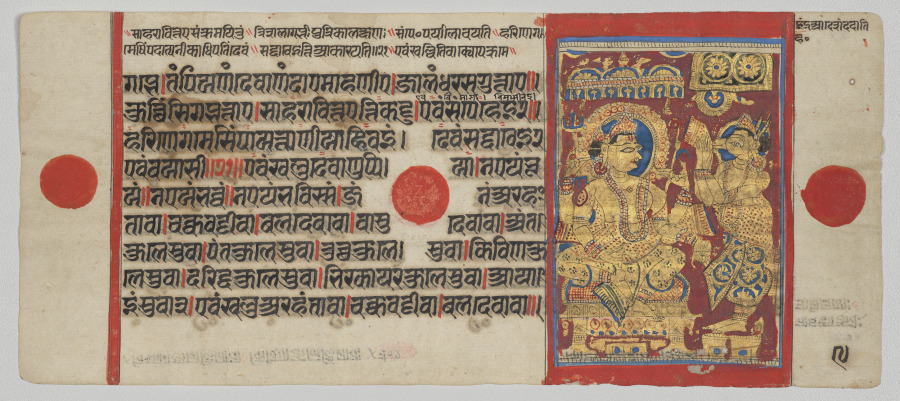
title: Indra Commands Harinaigameshin to Transfer the Embryo of Mahavira, Folio 9 (verso), from a Kalpa-sutra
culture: Western India, Gujarat, last quarter of the 15th century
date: c. 1475–1500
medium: Gum tempera, ink, and gold on paper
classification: Painting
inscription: [[upper right]] indra ādeśam dadāti Ha*